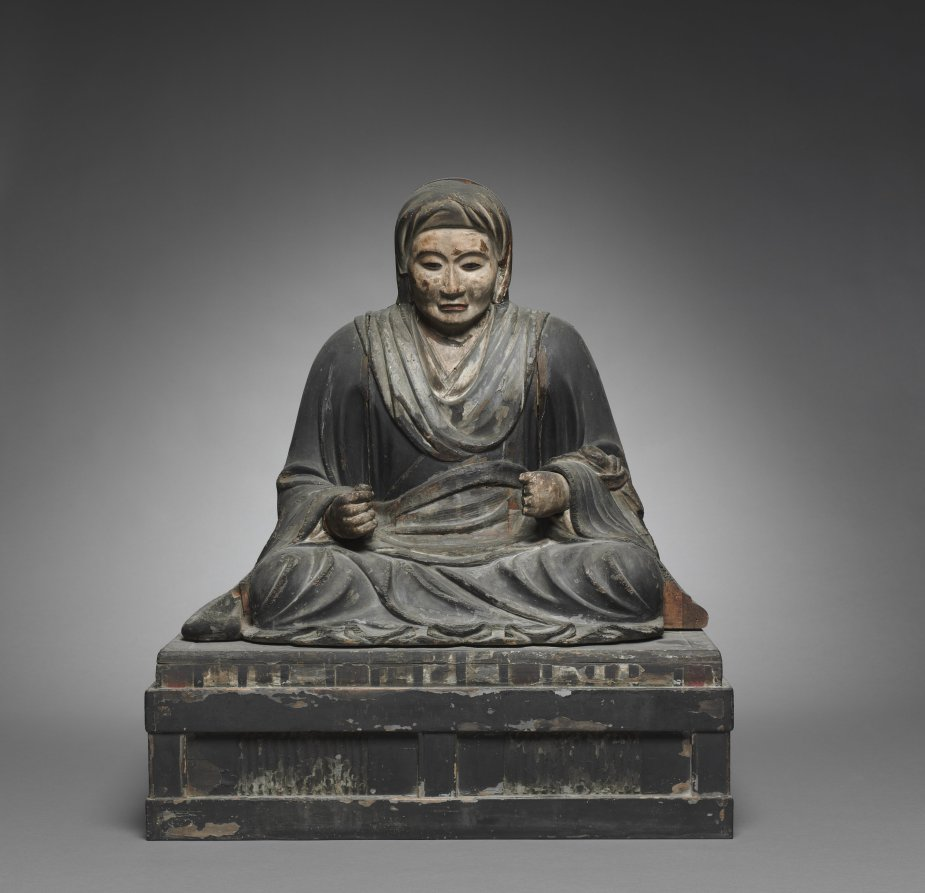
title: Portrait of the Mother of Hotto Kokushi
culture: Japan, Edo period (1615–1868)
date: 1680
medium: wood with polychromy and inlaid crystal and stone eyes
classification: Sculpture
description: This is an imaginary portrait of the mother of the Zen master Hottō Enmyō Kokushi (1203–1298), whose sculptural portrait (1970.67) can be seen in gallery 235B. That image was carved soon after the master's death. His mother's image, however, was completed several hundred years later, so the likeness is doubtful.